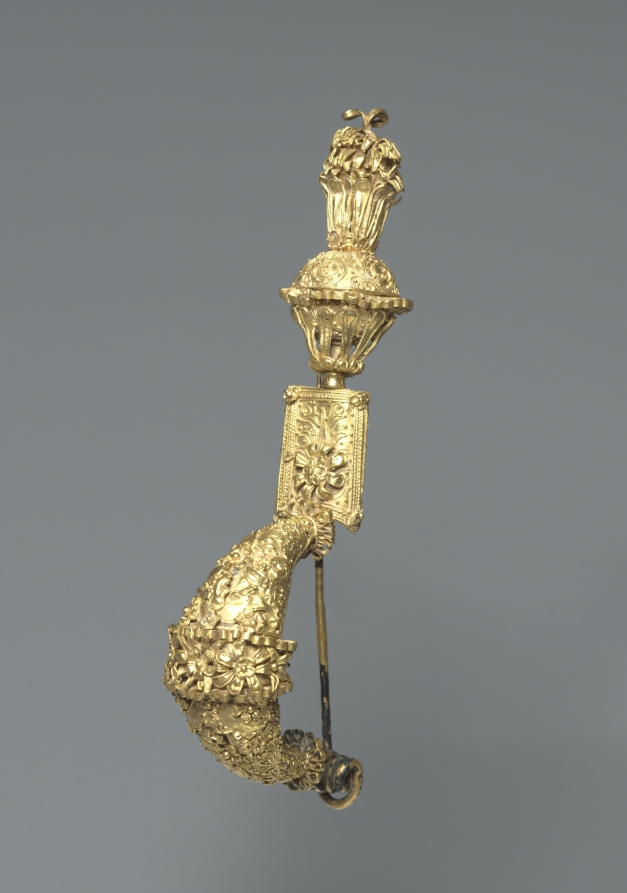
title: Fibula (Pin)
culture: Etruscan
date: 300s BCE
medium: gold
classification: Jewelry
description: This gold fibula consists of a leech-shaped bow attached to a pin, a plaque, and a biconical bead. A nine-petaled flower tops the bead. The fibula was likely used to fasten clothes by gathering fabric together. Unlike silver and bronze, gold does not easily tarnish.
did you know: This fibula was cast in three parts, the bow and pin, plaque, and bead, using the lost wax method.